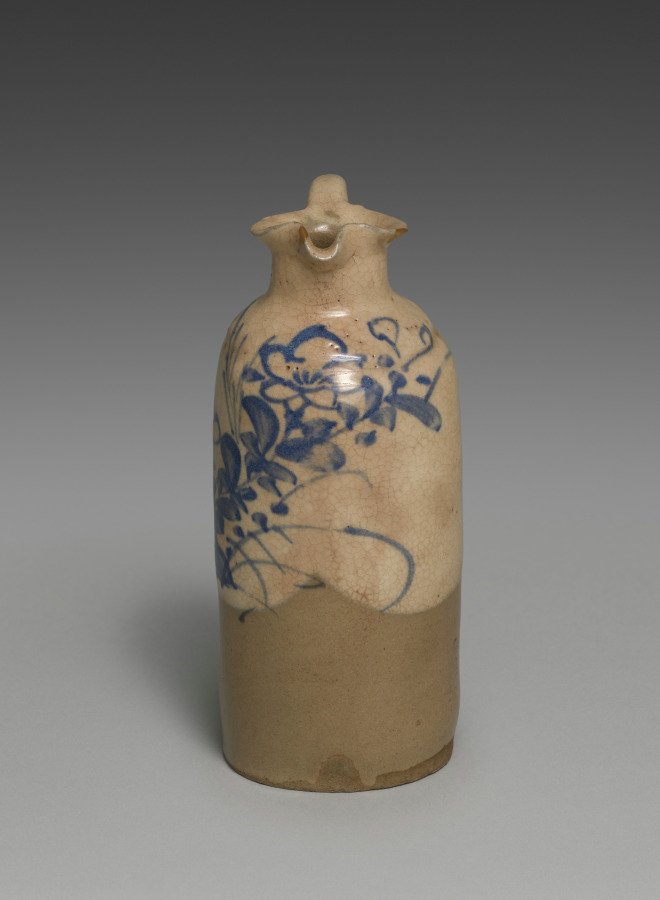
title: Sake Pourer with Bellflowers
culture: Japan, Edo period (1615–1868)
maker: attributed to Seifū Yohei I (Japanese, 1801–1861)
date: c. 1844–57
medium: one of a pair of sake flasks; stoneware with white slip, underglaze blue and gold repair (kintsugi) (Kyoto ware)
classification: Ceramic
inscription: The storage box for the pair of vessels is inscribed and impressed with seals.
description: This pair of sake pourers adorned with with bamboo and bellflowers is attributed to the founder of the Seifū Studio, Seifū Yohei I (1801–1861). Yohei I, the lineage founder, was born to the Yasuda family in the city of Kanazawa, which faces the Sea of Japan. His home province of Kaga (in present-day Ishikawa Prefecture) produced its own ceramics, known as Kutani ware, but for his training as a potter, Yohei I chose Kyoto, which produced the more technically advanced porcelain ware. He moved to Kyoto around the 1820s and became apprenticed to Nin’ami Dohachi, a leading potter in the city. He later struck out on his own, and it is likely that his teacher gave him the name Seifu Yohei. His works include many exquisitely painted copies of Chinese porcelain, and he also produced stoneware with overglaze color enamels that emulated works in the style of Ogata Kenzan (1663–1743) at which his teacher excelled.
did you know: Kintsugi is the Japanese art of repairing broken pottery by mending the areas of breakage with urushi lacquer dusted or mixed with powdered gold.